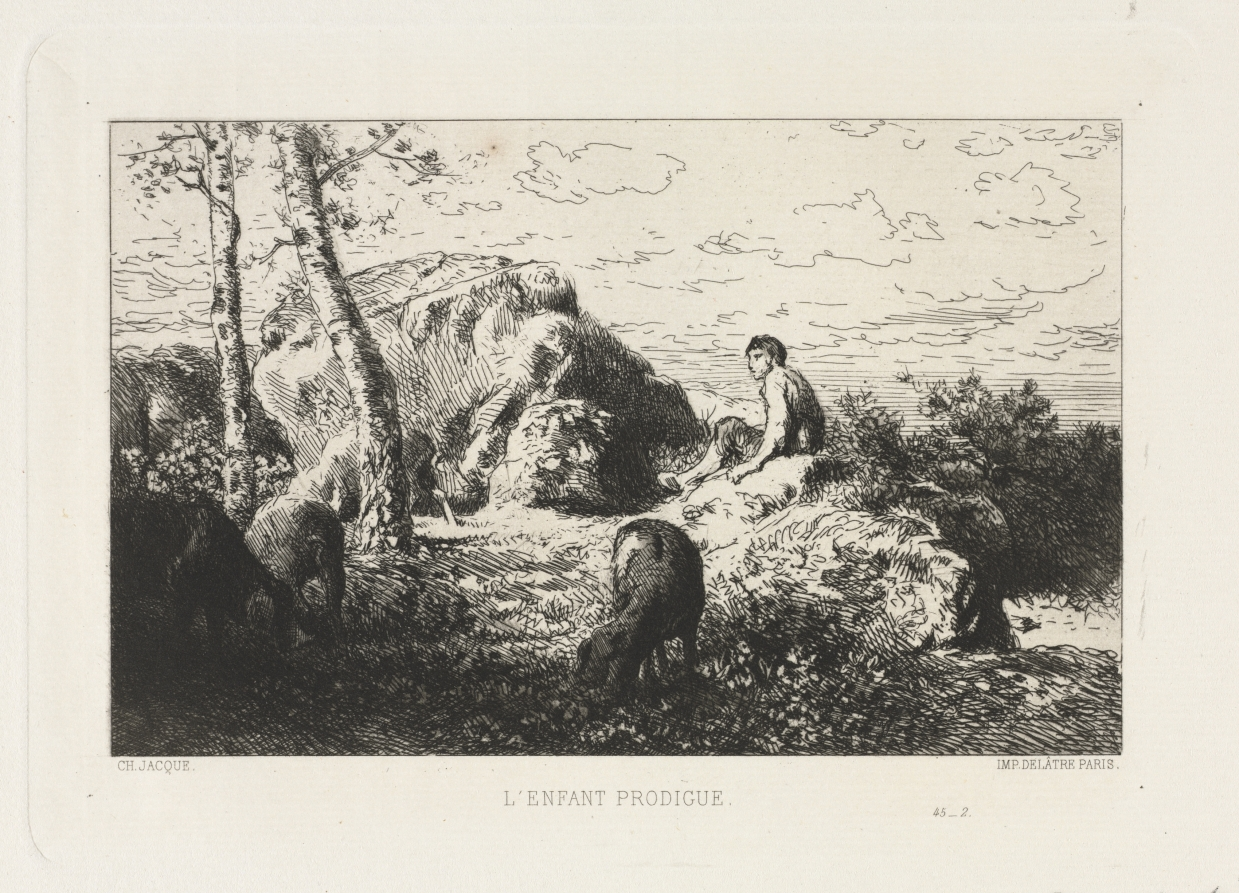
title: The Prodigal Son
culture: France, 19th century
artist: Charles-Émile Jacque (French, 1813–1894)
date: c. 1868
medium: etching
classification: Print